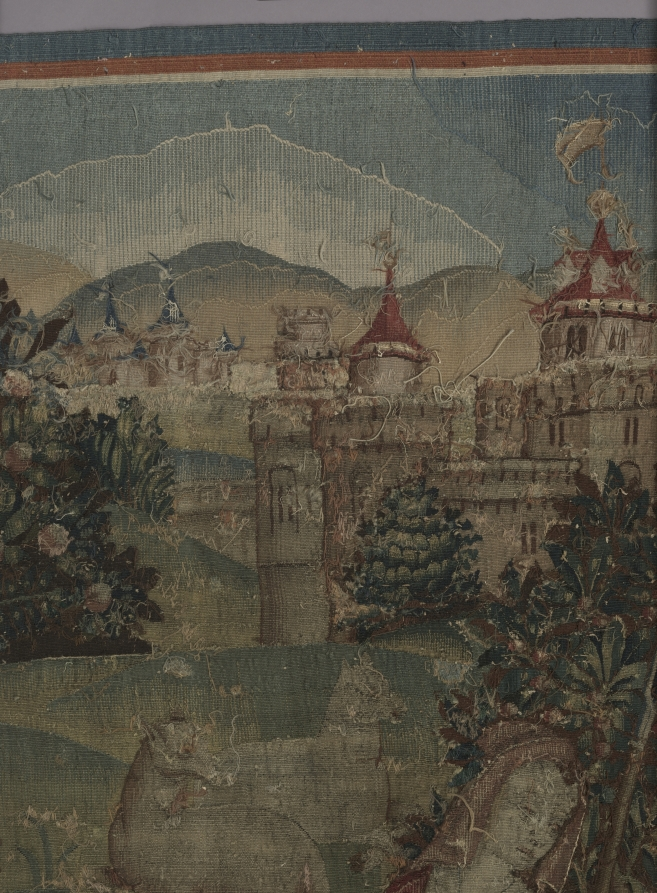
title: Shepherds in a Round Dance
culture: Netherlands, early 16th century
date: around 1500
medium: Wool and silk: tapestry weave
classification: Tapestry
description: Late medieval tapestries often use a limited yet contrasting color palette to portray stylized images. The expressions of these figures, for example, are conveyed more by their postures than by their faces. Four shepherds and shepherdesses join hands and dance to the music of a bagpiper at the far right, while a lord and two ladies on the left look on. A dog and sheep amid blossoming plants and trees contribute to the festive pastoral scene in front of a castle.